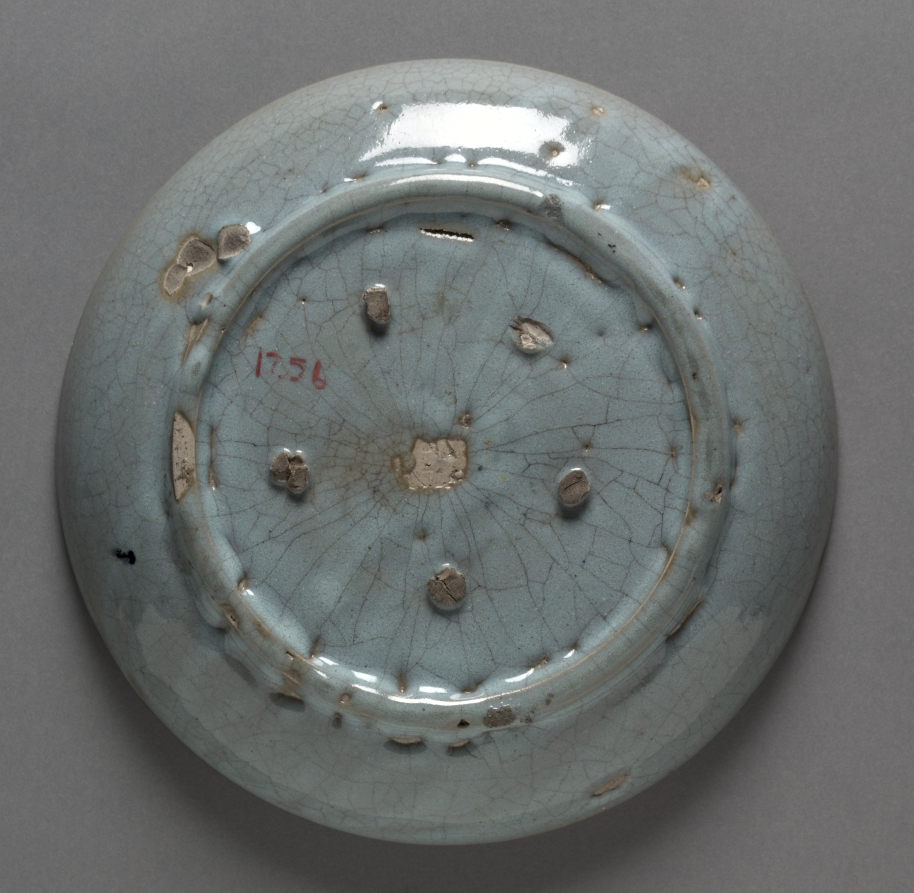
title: Plate: Jun Ware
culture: Northern China, Yuan dynasty (1271-1368)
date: 1279–1368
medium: Stoneware with mottled glaze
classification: Ceramic